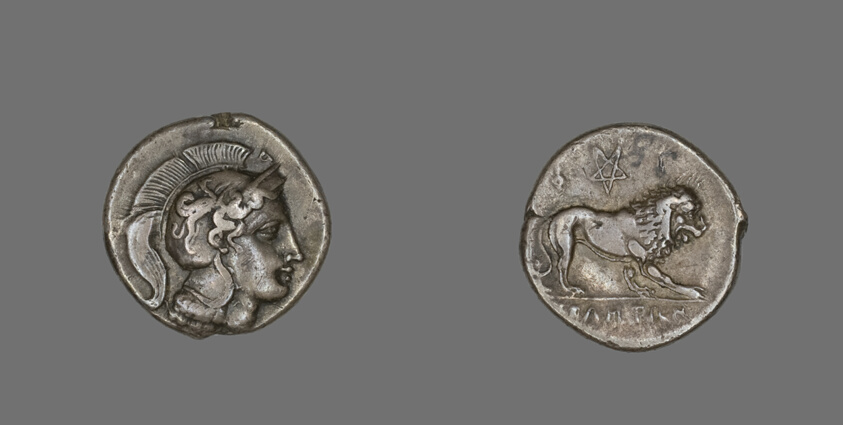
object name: Coin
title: Stater (Coin) Depicting the Goddess Athena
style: greek, ancient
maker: Greek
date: 400-317 BCE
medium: Silver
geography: Elea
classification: coin; ancient art; struck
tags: Athena, lions